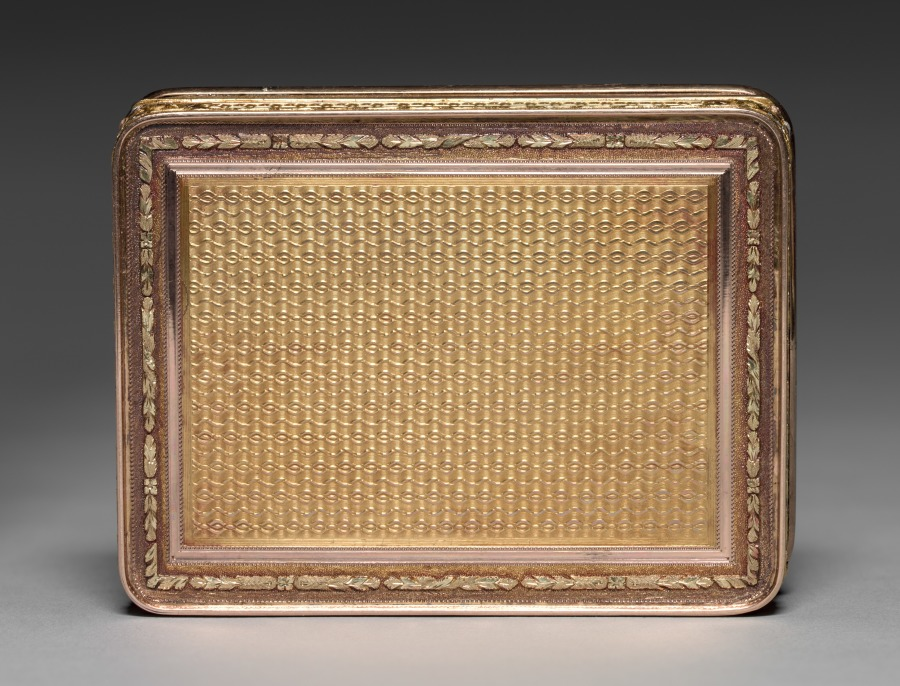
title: Portrait of a Man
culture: Switzerland, Neufchatel, mid-19th century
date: mid 1800s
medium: watercolor on ivory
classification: Miscellaneous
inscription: signed: "B."